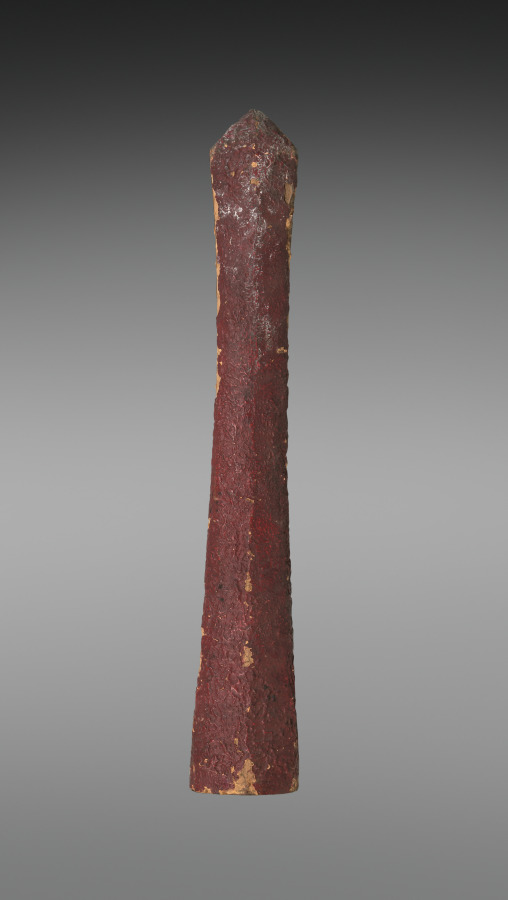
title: Sheath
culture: Japan, Edo period (1615–1868)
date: 1700s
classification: Arms and Armor